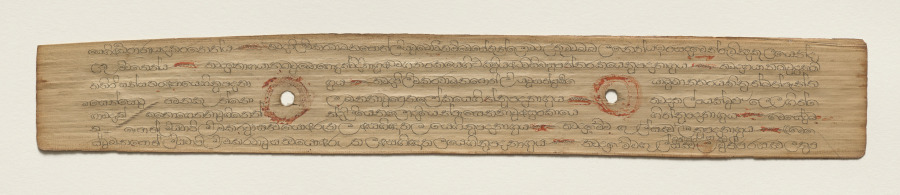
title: Leaf from a Buddhist Manuscript (verso)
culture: Sri Lanka, Singhalese, Late 17th century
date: c. 1700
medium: fiber paper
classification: Manuscript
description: Palm leaf material is still used for manuscripts in Sri Lanka. The palm leaves are prepared first by boiling them, drying them in the sun, and then rubbing them with oils. Scribes then use a metal stylus to incise the text. Then charcoal powder is wiped across the pages, filling in only the inscribed lines.